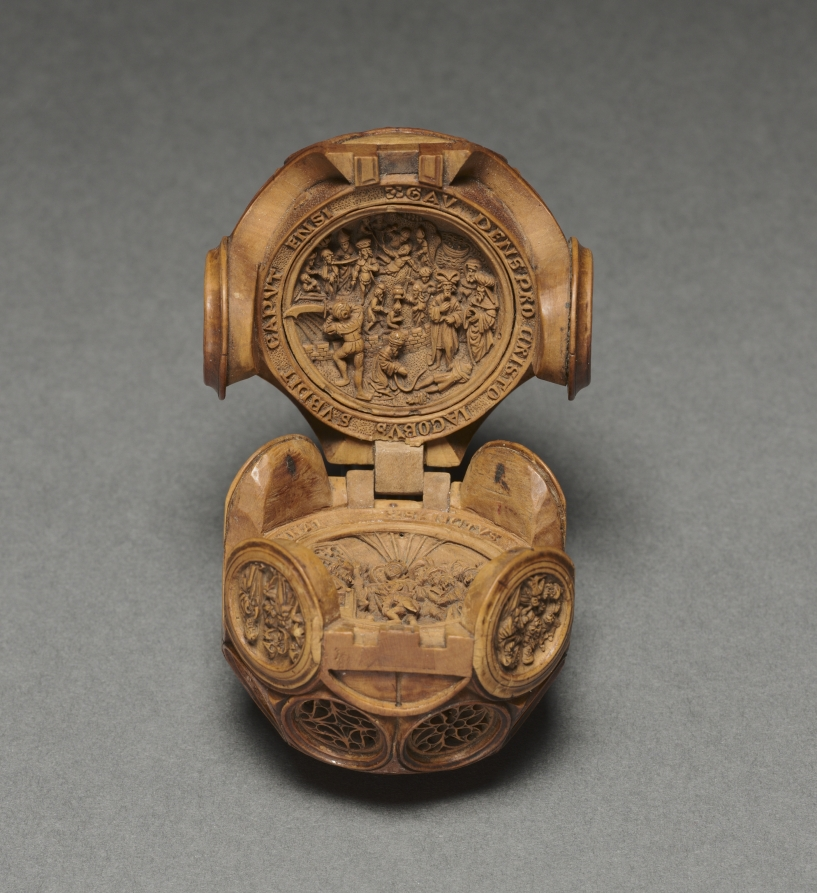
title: Prayer Nut with Scenes from the Life of St. James the Greater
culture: Northern Netherlands (Holland)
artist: Adam Dircksz (Netherlandish, active c. 1500)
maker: and Workshop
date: c. 1500–1530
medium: boxwood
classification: Sculpture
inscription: Interior around lower half: SANCTVS SACRILEGI STAT IVDICIS ANTE TRIBVNAL (Holiness stands before the throne of the profane judge)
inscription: Interior, around upper half: GAVDENS PRO CRISTO IACOBVS SVBDIT CAPVT ENSI (St James submits his head to the sword)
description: Prayer nuts are capsules that can be opened in half and were mainly worn from the end of the 1400s until 1530, particularly in the Netherlands. These objects are generally made from boxwood and carved with extreme refinement and delicacy. They often echo Gothic architecture and include openwork tracery or elaborate decorative patterns. Prayer nuts came into fashion for private devotion as a pendant on the rosary or on a decorative chain. The emergence of prayer nuts went hand in hand with the practice of praying the rosary more frequently at the end of the Middle Ages.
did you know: This miniature masterpiece was held and caressed within the palm of the holder as they prayed and meditated on their faith. What do you use to focus or engage in quiet concentration?